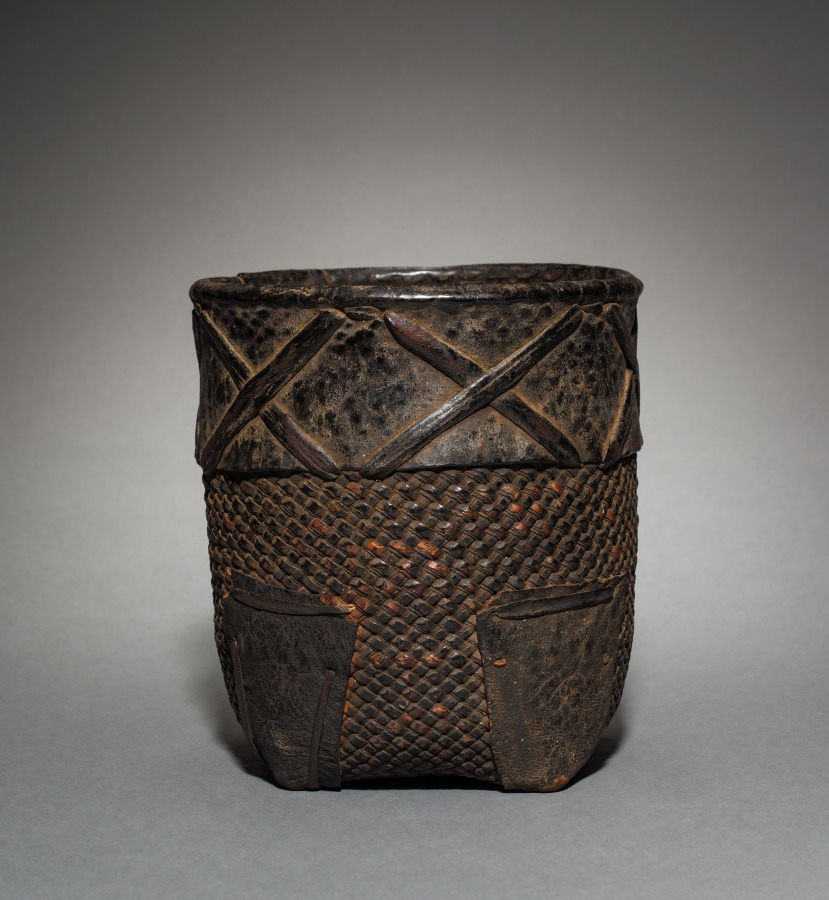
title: One of Ten Nesting Wedding Baskets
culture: Africa, Western Africa, Burkina Faso, Lobi–style maker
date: c. 1900s?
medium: Plant fiber and leather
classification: Vessels